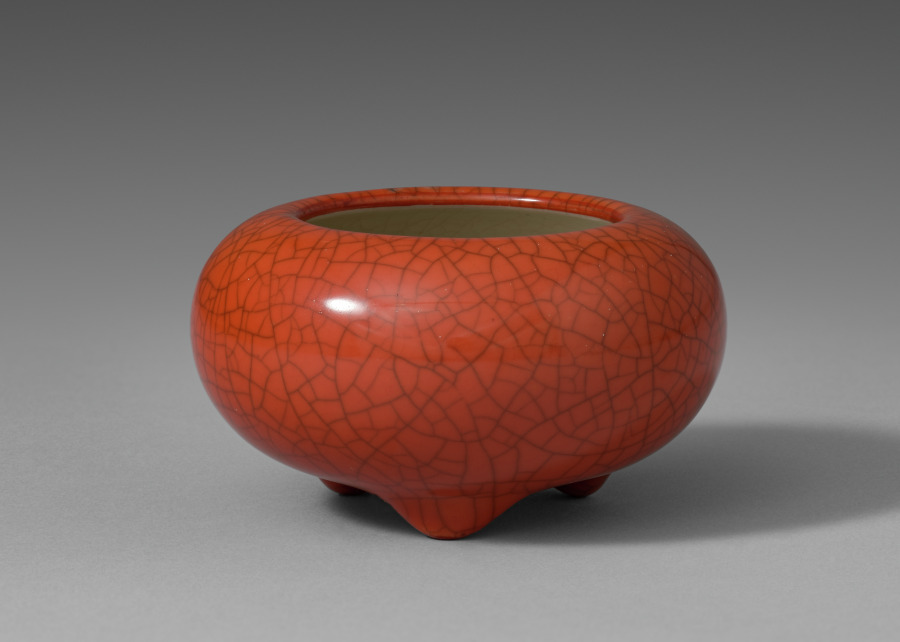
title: Incense Burner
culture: Japan, Meiji period (1868–1912)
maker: Seifū Yohei III (Japanese, 1851–1914)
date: 1893–1914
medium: Porcelain with coral red and crackled glaze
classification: Ceramic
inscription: 清風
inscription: "Hyatt King"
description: The tiniest of containers, this ovoid tripod is an incense burner. It likely once had an openwork metal lid. It is remarkable for its coral red color and crackled glaze. In contrast to the exterior, the interior has been left white under a transparent glaze. The “coral red glaze” is one Yohei III developed in 1887 and called sangōyu. Sensational among colors known at that time, Yohei III won first prize for his work glazed with it at the annual exhibition of the Japan Art Association (Bijutsu Kyokai) in 1888.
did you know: Seifū Yohei III’s incense burner has a red glaze that is difficult to achieve.